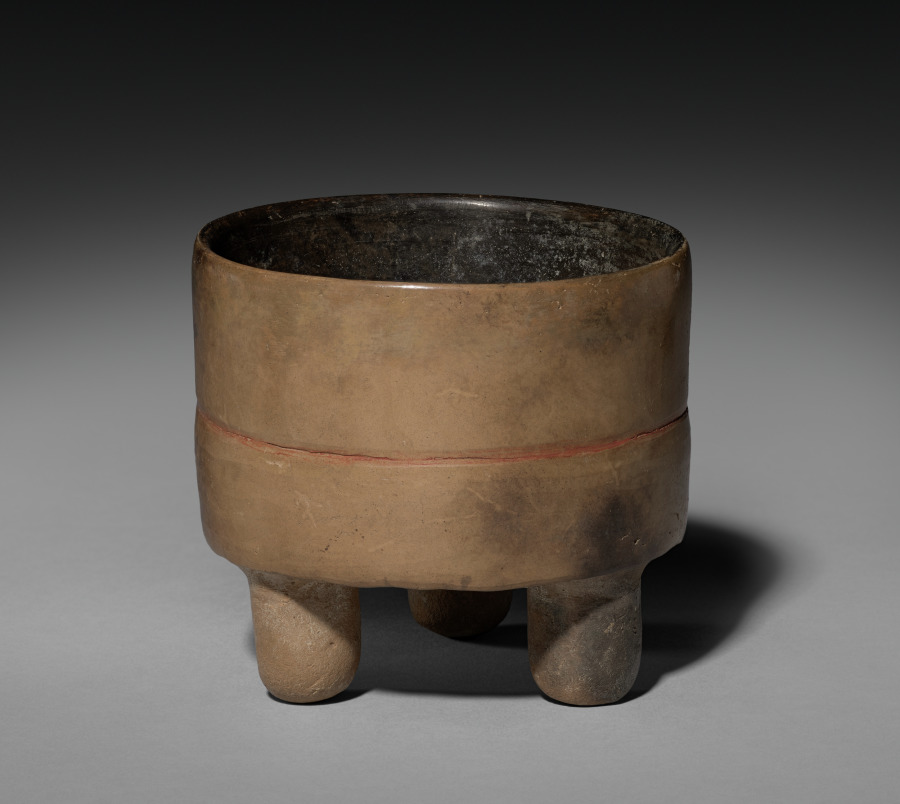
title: Tripod Vessel with Lid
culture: Mexico or Central America, Maya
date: 250–600 CE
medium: earthenware with pigment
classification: Ceramic